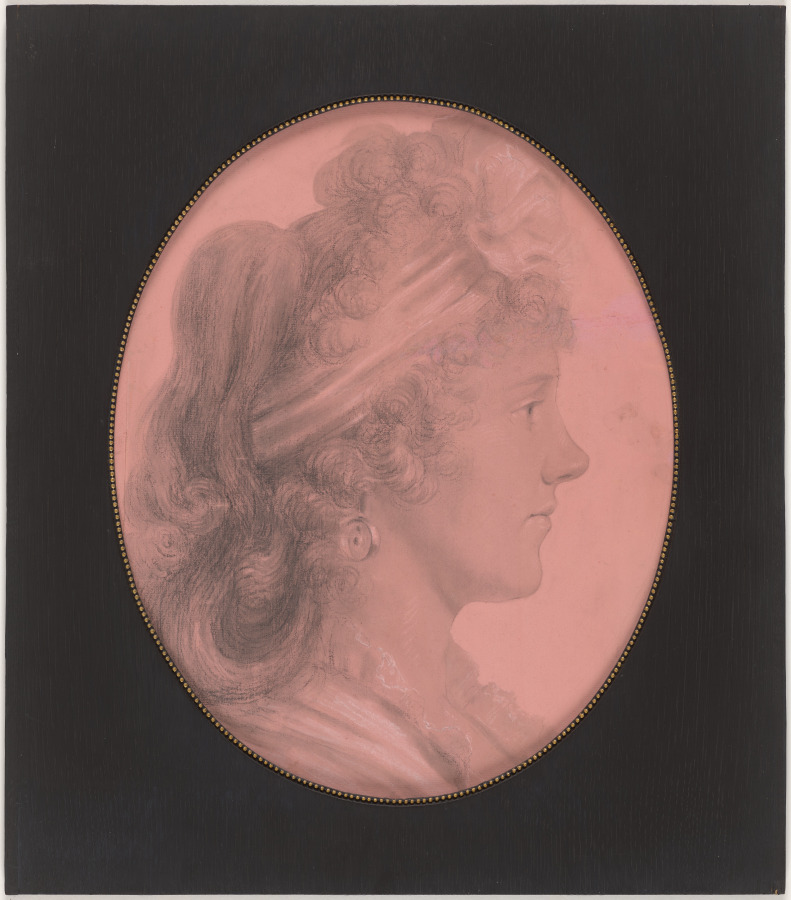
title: Portrait of Eleanor Ramsay Fitzwilliam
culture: France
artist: Charles Balthazar Julien Fevret de Saint-Mémin (French, 1770–1852)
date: c. 1790–1852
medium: Black and white chalk on buff paper with pink wash in original frame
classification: Drawing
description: This portrait and its pair (2024.35.1), depict George Fitzwilliam, an English merchant, and his American wife Eleanor Ramsay Fitzwilliam, who sat in New York for the French émigré artist Charles Balthazar Julien Févret de Saint-Mémin. Saint-Mémin used a recently invented mechanical device called a physiognotrace to trace accurate profiles of his sitters, which he then completed in black and white chalks. The technology enabled Saint-Mémin to establish a thriving business catering to prominent Americans—including Presidents Washington, Adams, Jefferson, and Madison, Benjamin Franklin, and several Native American chiefs—at a time when he was in exile from the French Revolution. As part of each commission, Saint-Mémin also supplied etchings of the portrait in a reduced size, which could be given as keepsakes to family and friends.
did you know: The physiognotrace device used to create this portrait consisted of a wooden frame within which a sitter posed in profile; the artist then peered through an eyepiece and followed the contour and features of the sitter’s face by maneuvering a graphite pencil attached to the mechanism.